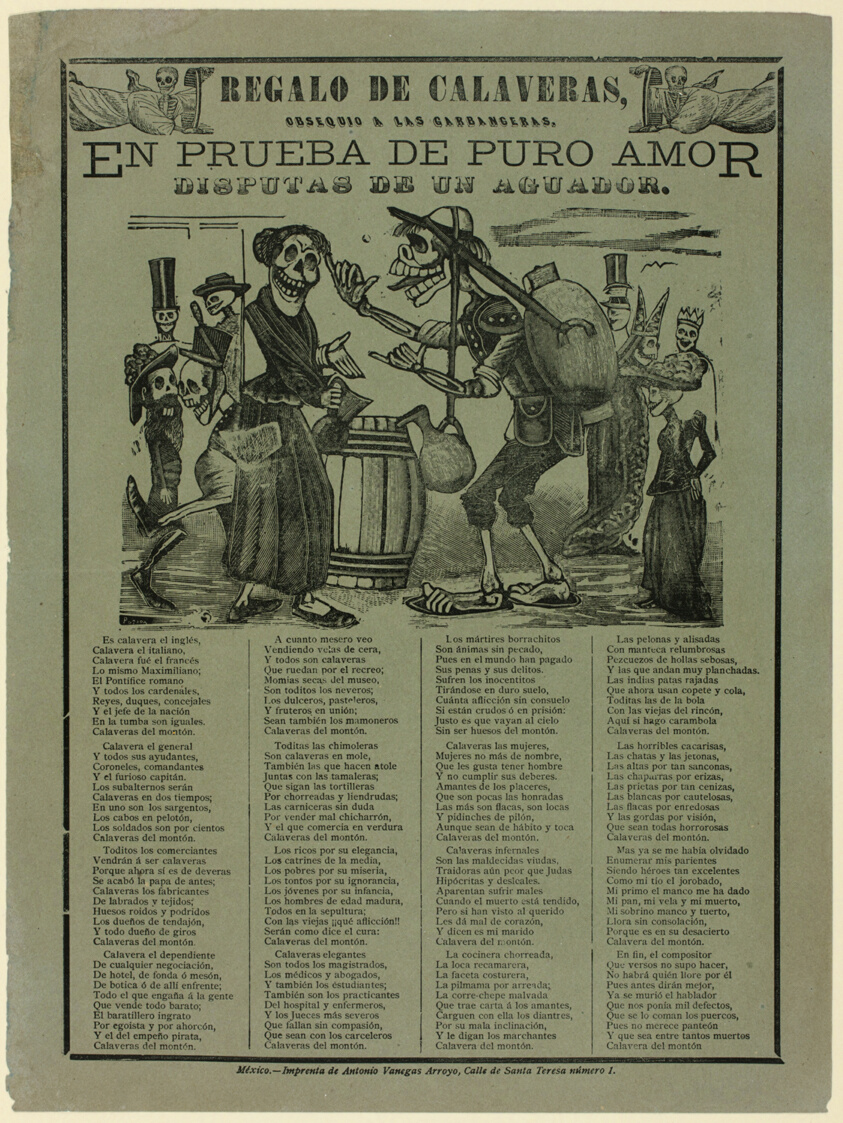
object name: Print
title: Gift of Calaveras, Given to the Chickpea Sellers. As Proof of True Love, Quarrels of a Water Seller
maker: José Guadalupe Posada (Mexican, 1852-1913)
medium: Relief engraving or photo relief etching on wove paper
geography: Mexico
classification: lithograph; print; prints and drawing